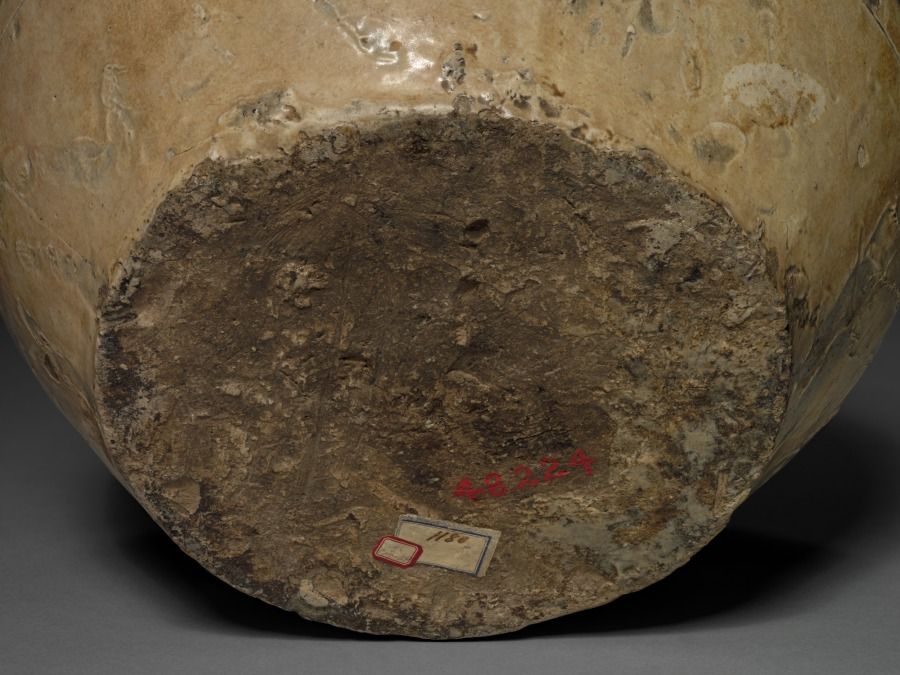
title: Jar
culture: China, Manchuria, Liao dynasty (916-1125)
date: 907–1125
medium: Glazed stoneware, Cizhou ware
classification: Ceramic